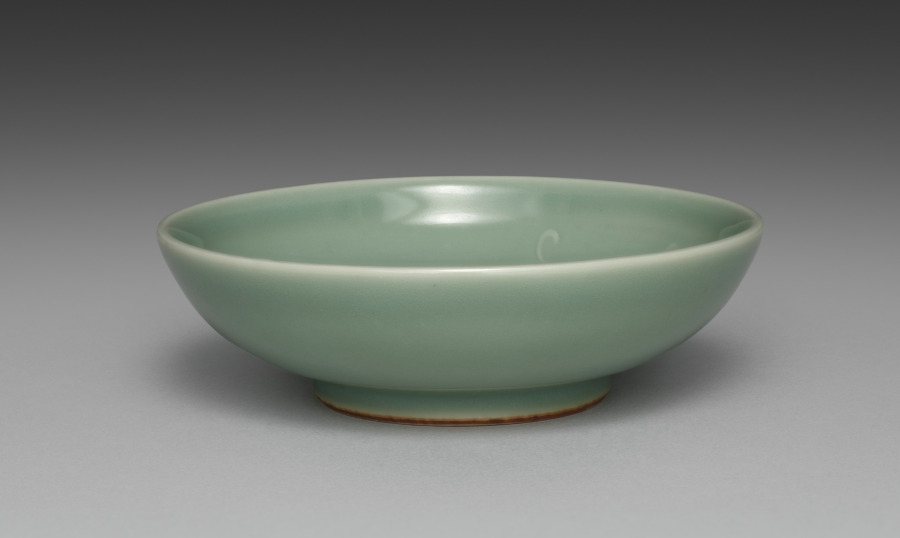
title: Dish from Dishes with Ivy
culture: Japan, Meiji period (1868–1912)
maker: Seifū Yohei III (Japanese, 1851–1914)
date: 1893–1914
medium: One from a set of five dishes; porcelain with green glaze and molded designs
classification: Ceramic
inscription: 清風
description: Yohei III’s main output for his sophisticated clientele was in the form of tea sets and dining sets. He often produced in pairs, sets of five, or sets of ten. This set of five dishes with a green glaze and designs of ivy vines in very low relief has unfortunately lost its box. These dishes are slightly larger than the other dishes, like CMA 2022.187, and so may have been not saucers but rather small plates for meals.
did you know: In his career, Seifū Yohei III created a range of dishes in green glazes.